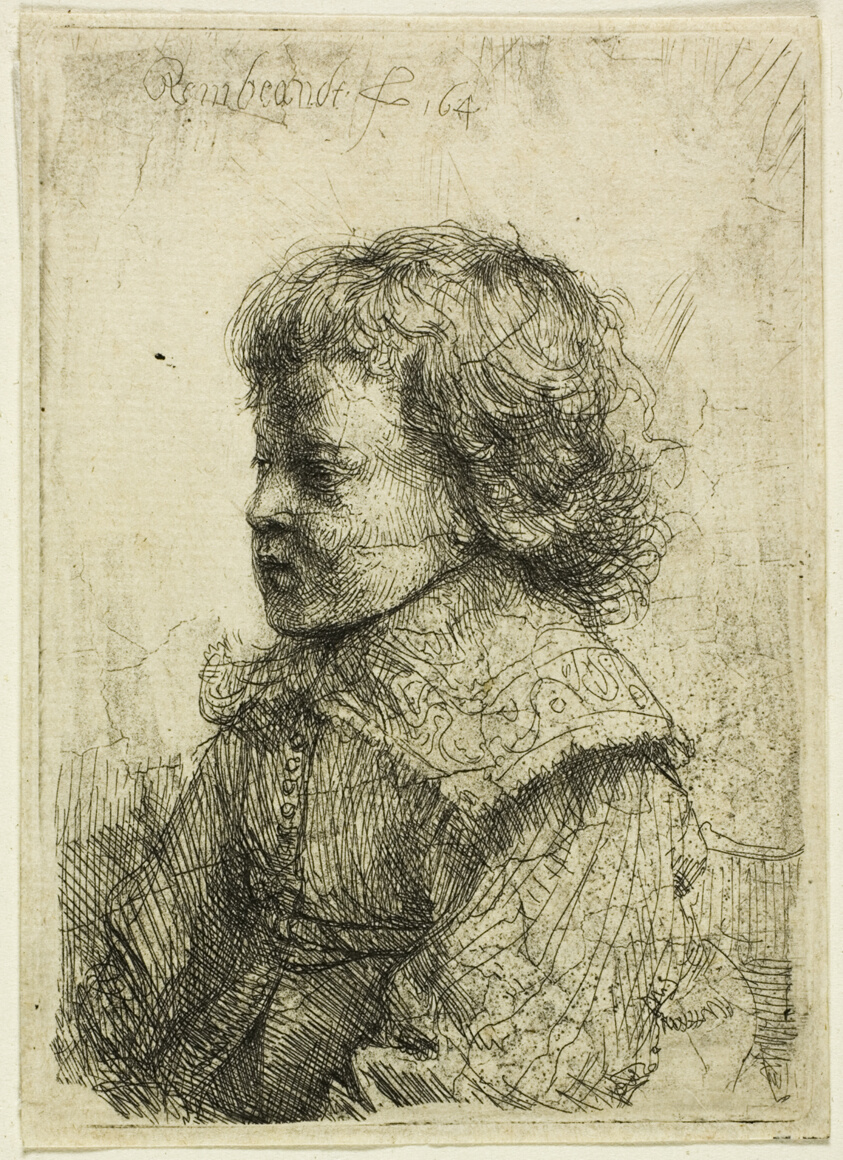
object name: Print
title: Portrait of a Boy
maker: Rembrandt van Rijn (Dutch, 1606-1669)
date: 1641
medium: Etching and drypoint on paper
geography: Holland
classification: etching; print; prints and drawing; paper; drypoint